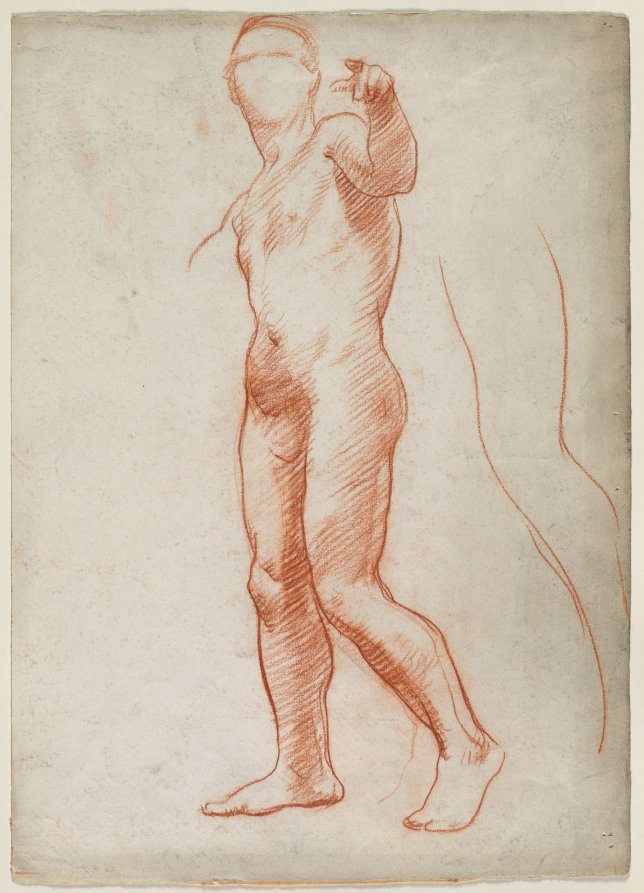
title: Standing Male Nude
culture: England(?), 20th century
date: first half 1900s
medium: red chalk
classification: Drawing